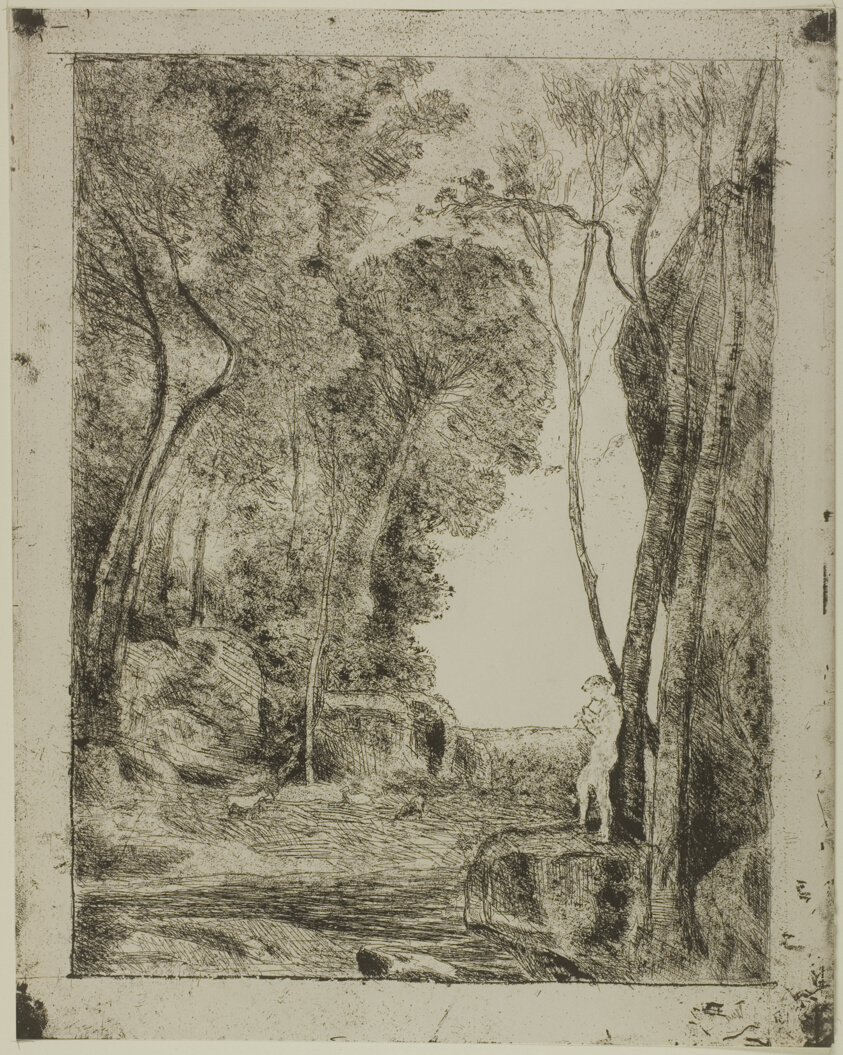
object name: Print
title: The Young Shepherd, first plate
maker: Jean-Baptiste-Camille Corot; French, 1796-1875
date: 1855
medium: Cliché-verre on ivory photographic paper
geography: France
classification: cliché-verre; print; prints and drawing